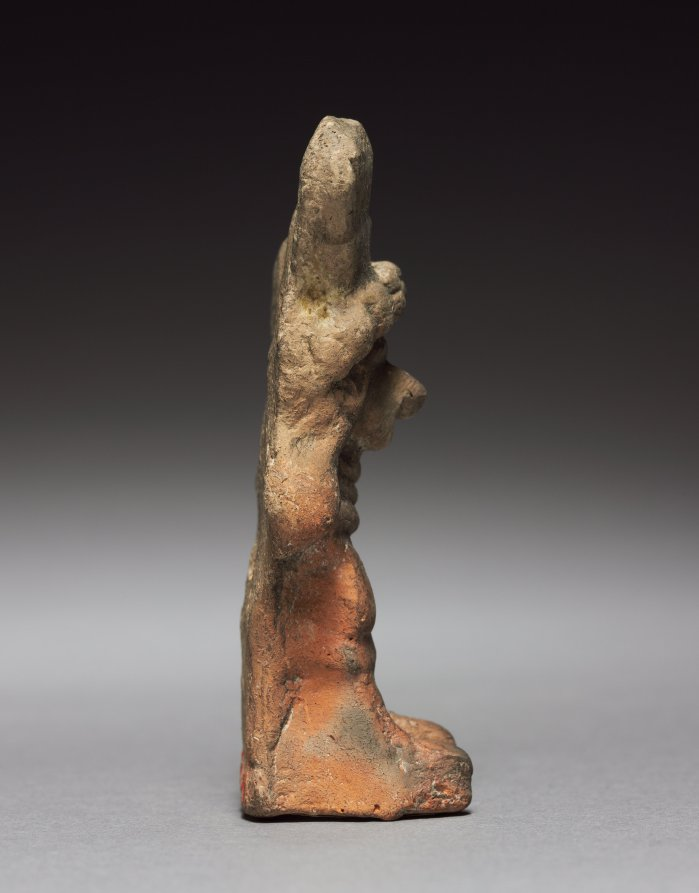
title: Figurine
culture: Mexico, Aztec, 14th century-16th century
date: 1325–1521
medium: terracotta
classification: Ceramic